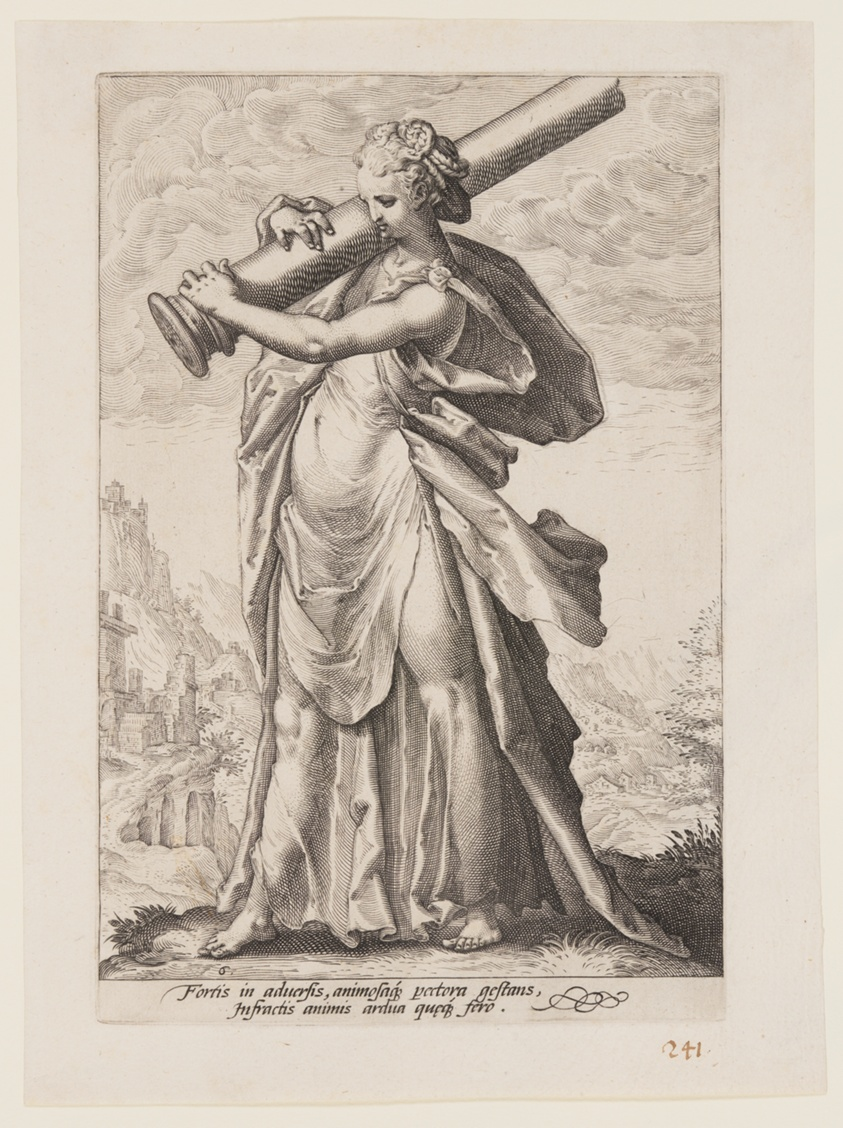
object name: Print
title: Fortitude, from The Virtues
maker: Jacob Matham (Dutch, 1571–1631); after Hendrick Goltzius (Dutch, 1558–1617)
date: c. 1593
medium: Engraving on ivory laid paper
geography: Netherlands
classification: engraving; paper; print; prints and drawing